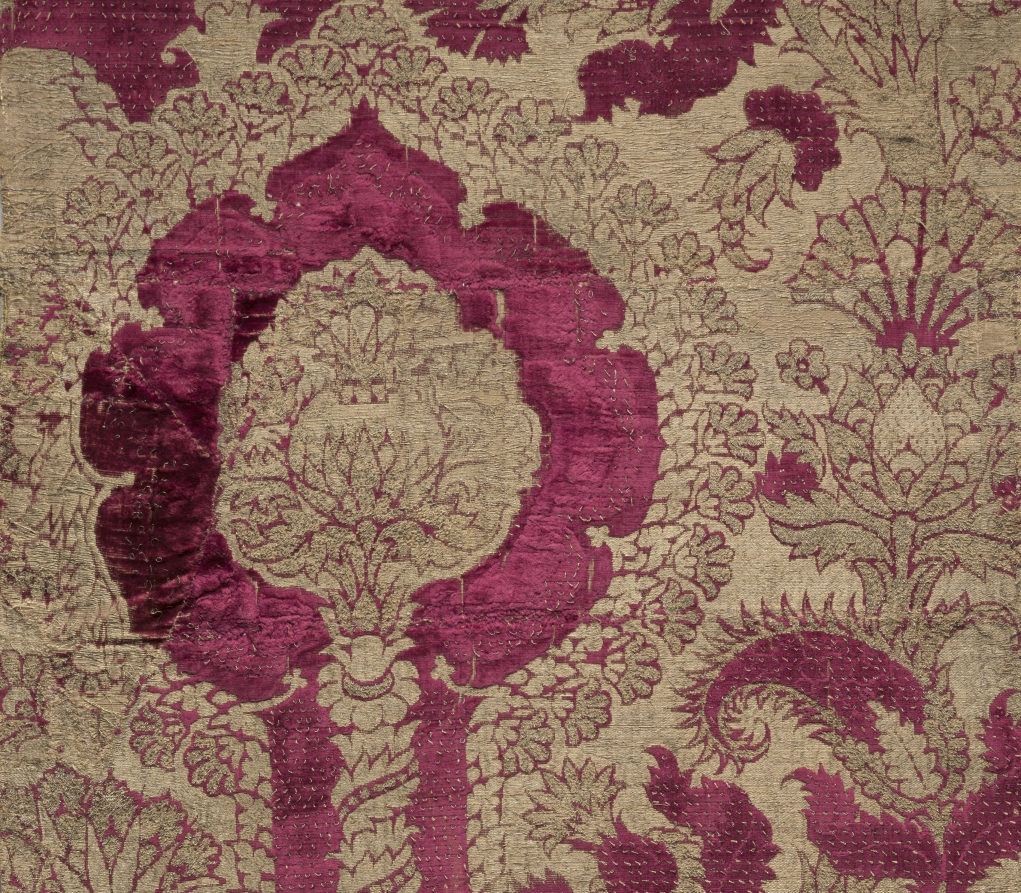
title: Velvet with Pomegranate Pattern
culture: Italy, Florence, 15th century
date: 1450–1500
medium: silk, gold thread; velvet: three heights of cut pile, gold thread loops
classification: Velvet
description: This extravagant Italian velvet with three heights of lush crimson pile is lavishly embellished with gold-thread loops. Large pomegranate patterns such as this were fashionable in Europe for more than a century, about 1420 to 1550, and were often featured in paintings and in large wall tapestries. Variations occurred in pattern details, pile height, and gold thread. Since pomegranates symbolized eternity, fertility, and resurrection, these velvets were often used in Roman Catholic churches. This pomegranate pattern inspired the cope, or cloak, worn by the Archbishop of Canterbury when he officiated the royal wedding of Prince William and Kate Middleton in 2011.